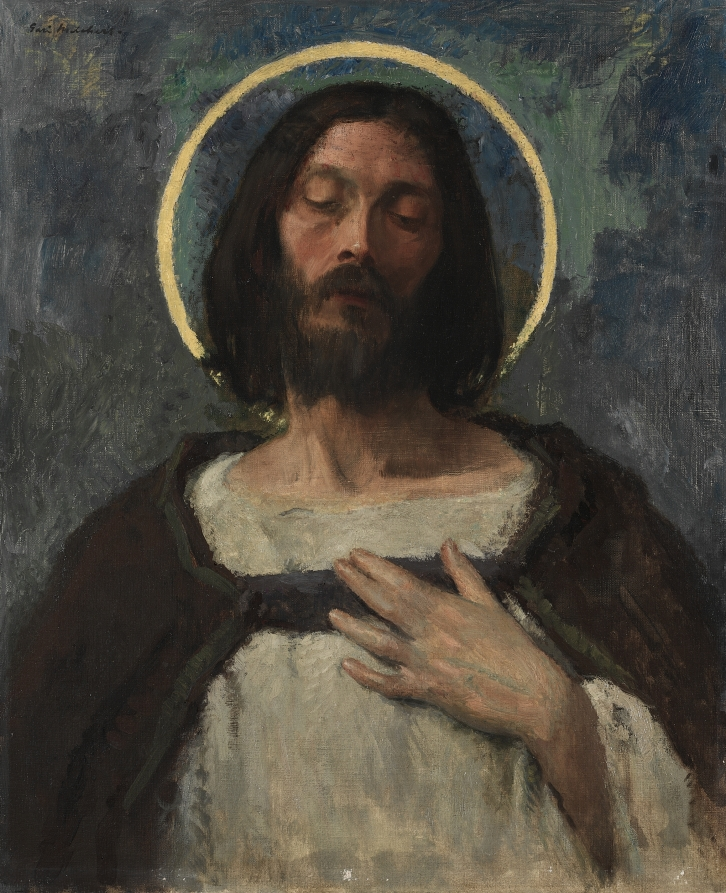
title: Christ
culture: America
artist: Gari Melchers (American, 1860–1932)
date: c. 1905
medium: oil on canvas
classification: Painting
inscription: signed upper left: Gari Melchers